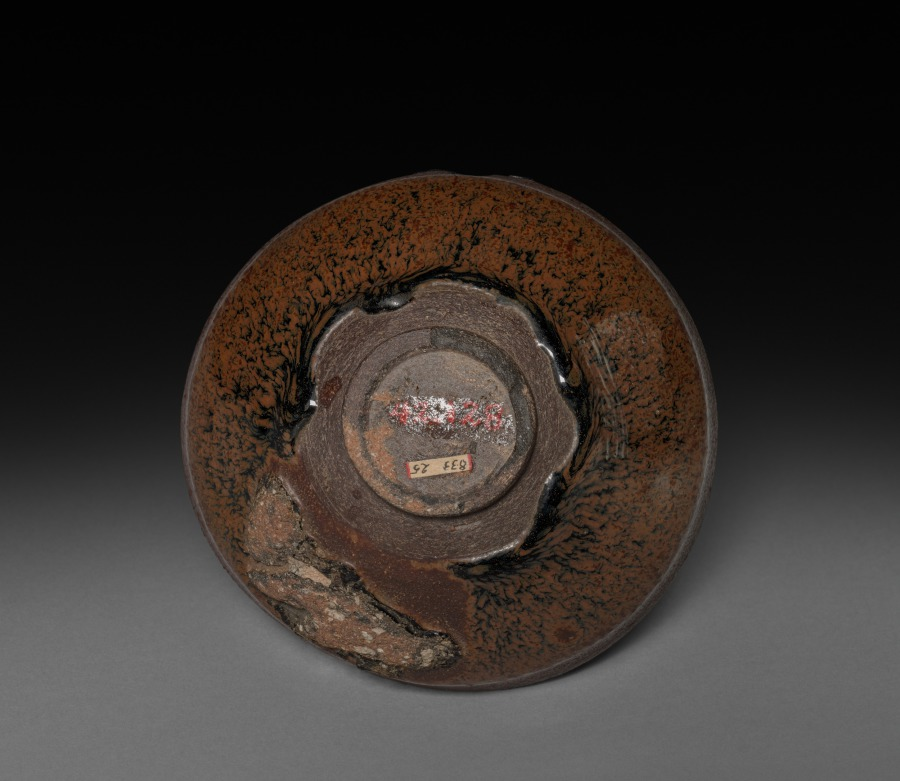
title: Tea Bowl: Jian ware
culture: China, near Shui ch'i, Song dynasty (960-1279)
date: 960–1279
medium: stoneware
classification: Ceramic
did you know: Jian ware was very popular with the tea cultures in China and Japan.